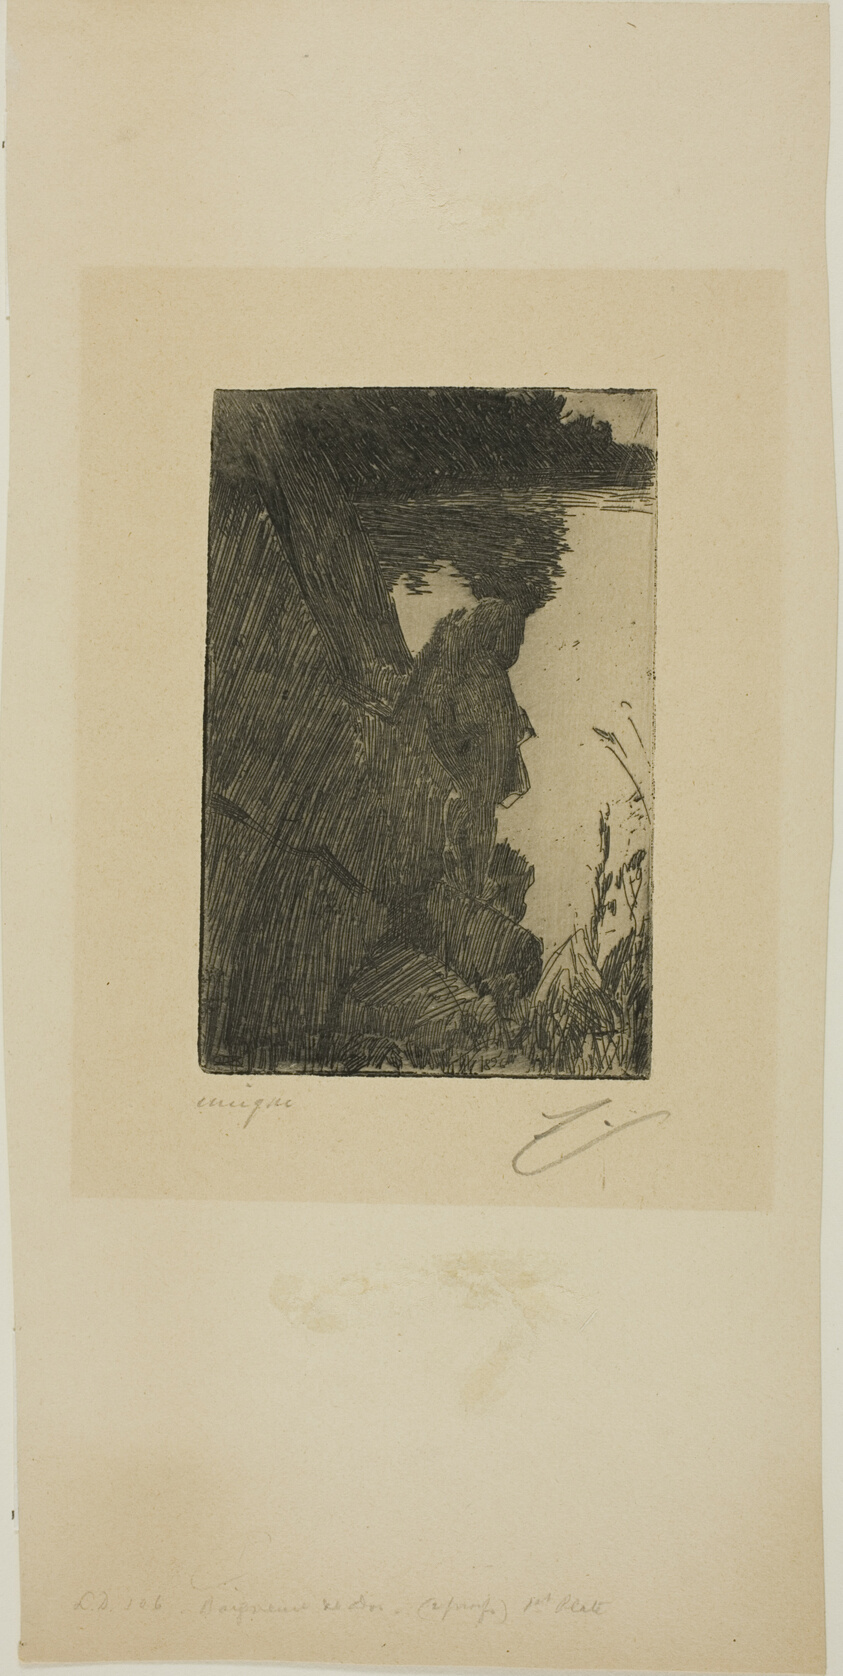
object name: Print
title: Bather (Evening) I (Zinc etching)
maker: Anders Zorn (Swedish, 1860-1920)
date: 1896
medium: Etching on tan wove paper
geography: Sweden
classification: etching; print; prints and drawing